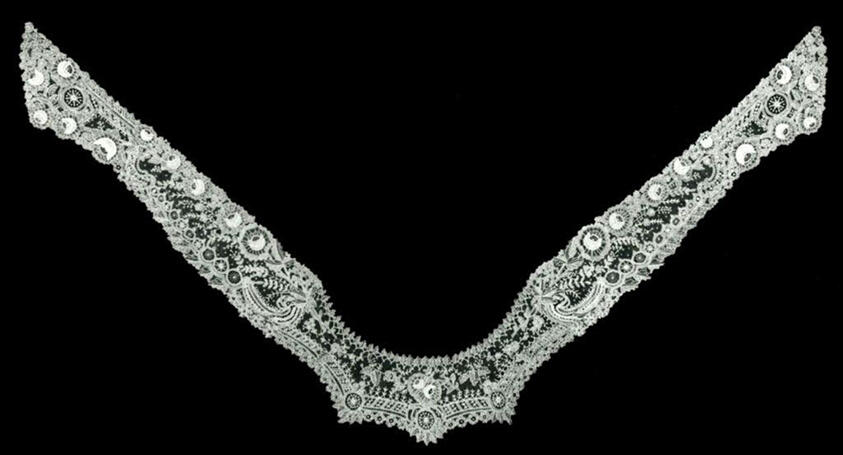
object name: Textile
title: Collar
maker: Belgium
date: 1880s/90s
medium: Cotton, needle lace of a type known as "Point de Gaze"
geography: Belgium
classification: textile; lace - needle